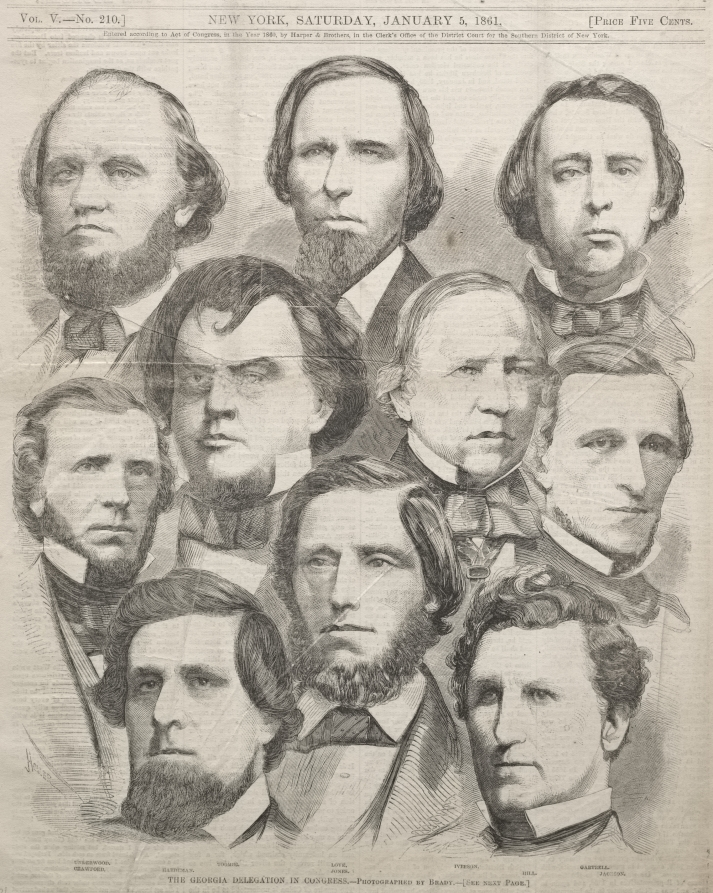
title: The Georgia Delegation in Congress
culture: America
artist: Winslow Homer (American, 1836–1910)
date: 1861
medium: wood engraving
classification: Print